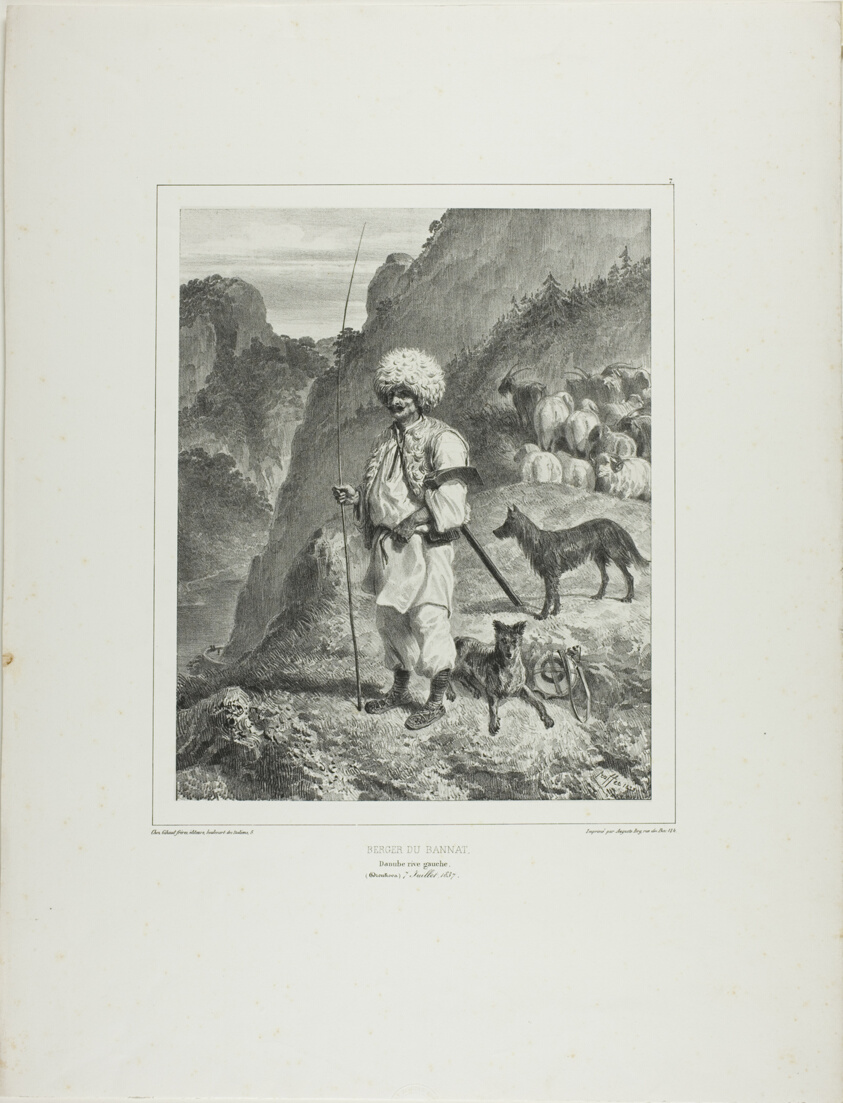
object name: Print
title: Bannat Shepherd, Left Bank of the Danube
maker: Denis Auguste Marie Raffet (French, 1804-1860); printed by Auguste Bry (French, 19th century); published by Chez Gihaut Frères (French, 19th century)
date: 1838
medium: Lithograph on gray chine laid down on ivory wove paper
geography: France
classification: lithograph; print; prints and drawing